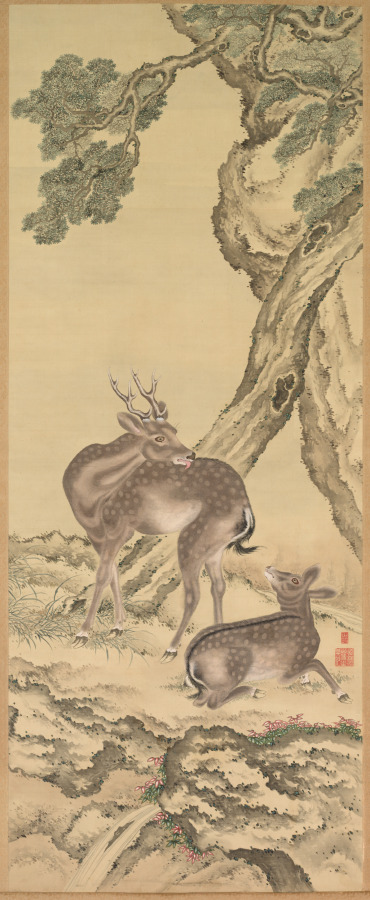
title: Symbols of Longevity: Deer under Peach and Pine (Peach) (left)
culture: Japan, Edo period (1615–1868)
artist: Toda Tadanaka (Japanese, 1761–1823)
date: 1801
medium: Pair of hanging scrolls; ink and color on silk (ivory roller ends)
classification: Painting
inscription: Lefthand painting signed: Kano no tori natsubi Fuji Gon'ei utsusu (Painted on a summer day in 1801 by Fuji Gon'ei) Lefthand painting sealed beneath signature: square red seal with patterned border above; Fujiwara, square red seal below; Tadanaka yajirushi Lefthand painting sealed lower left: rectilinear red seal unread